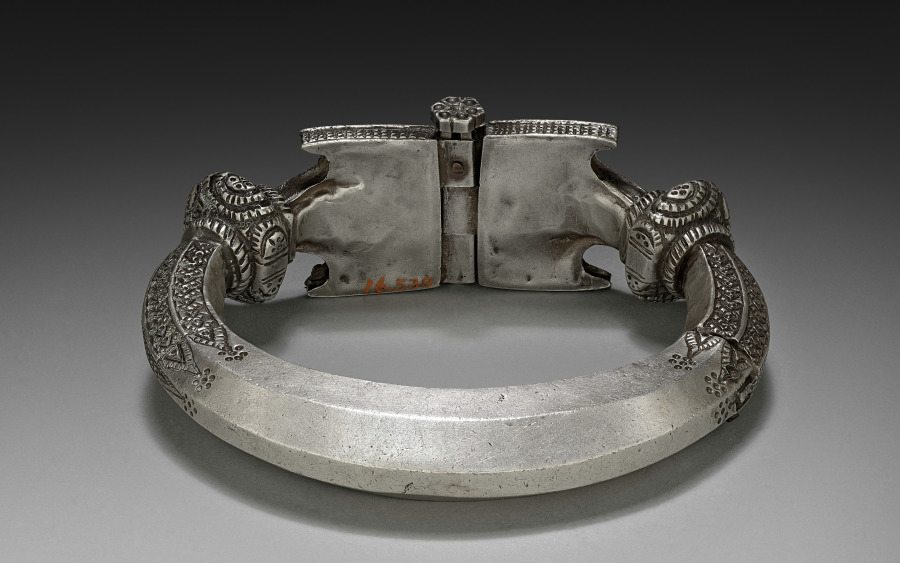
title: Bracelet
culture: India, Karachi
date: 1800s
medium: silver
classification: Jewelry